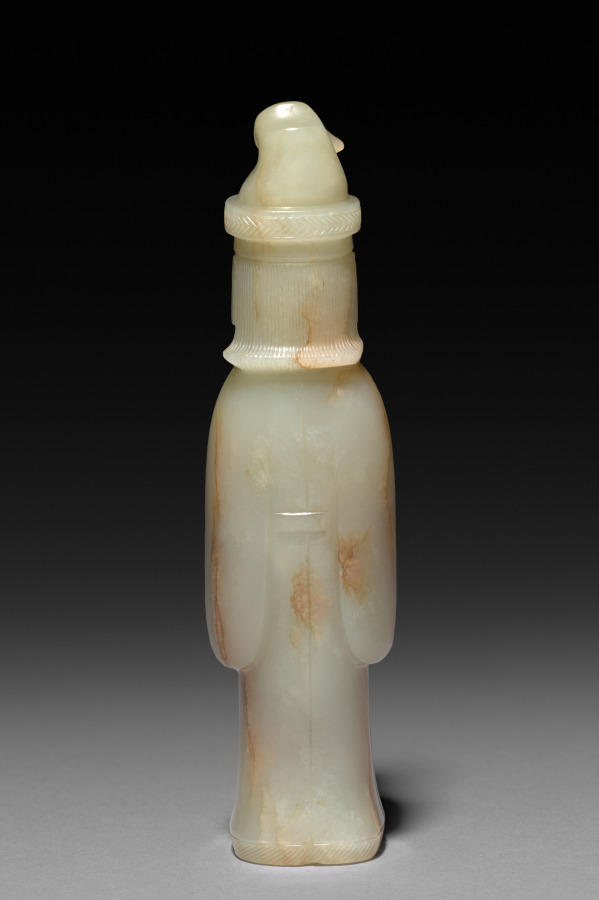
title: Standing Figure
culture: China, Qing dynasty (1644-1911)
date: 1644–1911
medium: jade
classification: Jade